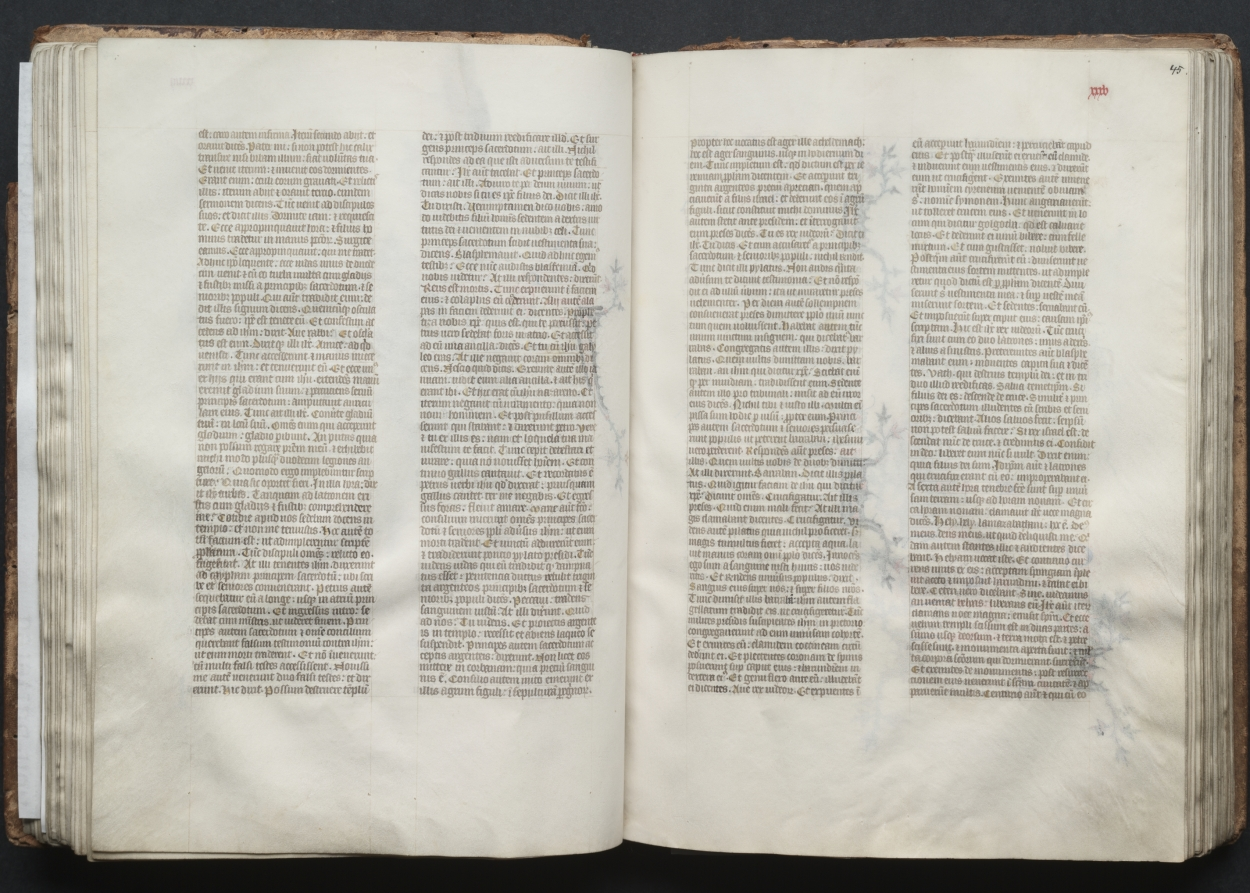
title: The Gotha Missal: Fol. 45r, Text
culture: France, Paris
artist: Master of the Boqueteaux (French)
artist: and Workshop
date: c. 1375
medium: ink, tempera, and gold on vellum; blind-tooled leather binding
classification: Bound Volume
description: The style and quality of this manuscript's decoration is typical of deluxe Parisian books made for aristocratic or royal patrons. Most of the book's decoration appears to be the work of the Master of the Boqueteaux, an artist active at the court of King Charles V (died 1380). His style was apparently shared by a number of book illuminators working in and around Paris. It is very possible that the Gotha Missal belonged to Charles V, but is not provable because the manuscript has no royal portraits and lacks a colophon. Given the book's magnificent decoration, however, it would seem that it was produced for a Valois prince, if not for the king himself. The manuscript receives its name from the German dukes of Gotha, its later owners.